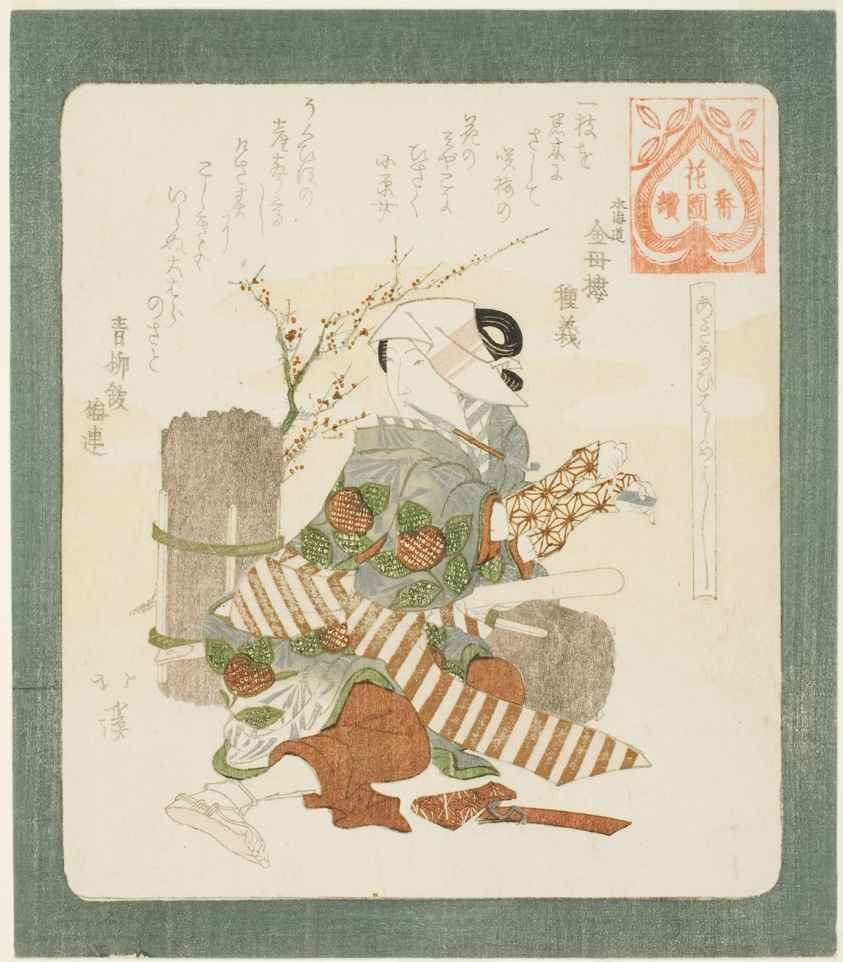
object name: Print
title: It is good to open for business (Akinai hajime yoshi), from the series "A Series for the Hanazono Group (Hanazono bantsuzuki)"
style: Japanese (culture or style)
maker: Totoya Hokkei (Japanese, 1780-1850)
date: c. 1822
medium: Color woodblock print; shikishiban, surimono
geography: Japan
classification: woodblock print; print; asian art